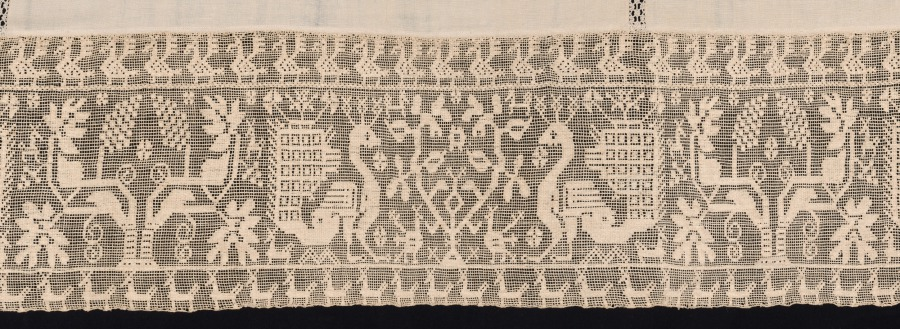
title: Cloth with Border of Peacocks and Vegetation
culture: Italy, 1600s-1700s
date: 1600s–1700s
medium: plain weave bleached linen (est.): needle lace, burato (twined ground and darned in one direction)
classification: Lace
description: This large cloth shows a repeated pattern of confronted peacocks flanked by decorative motifs. More birds appear in the register above, and a pattern of four-legged animals is in the register below.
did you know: Based on the ancient belief that the peacock’s flesh never decayed, they became a symbol of immortality and the Resurrection of Christ.